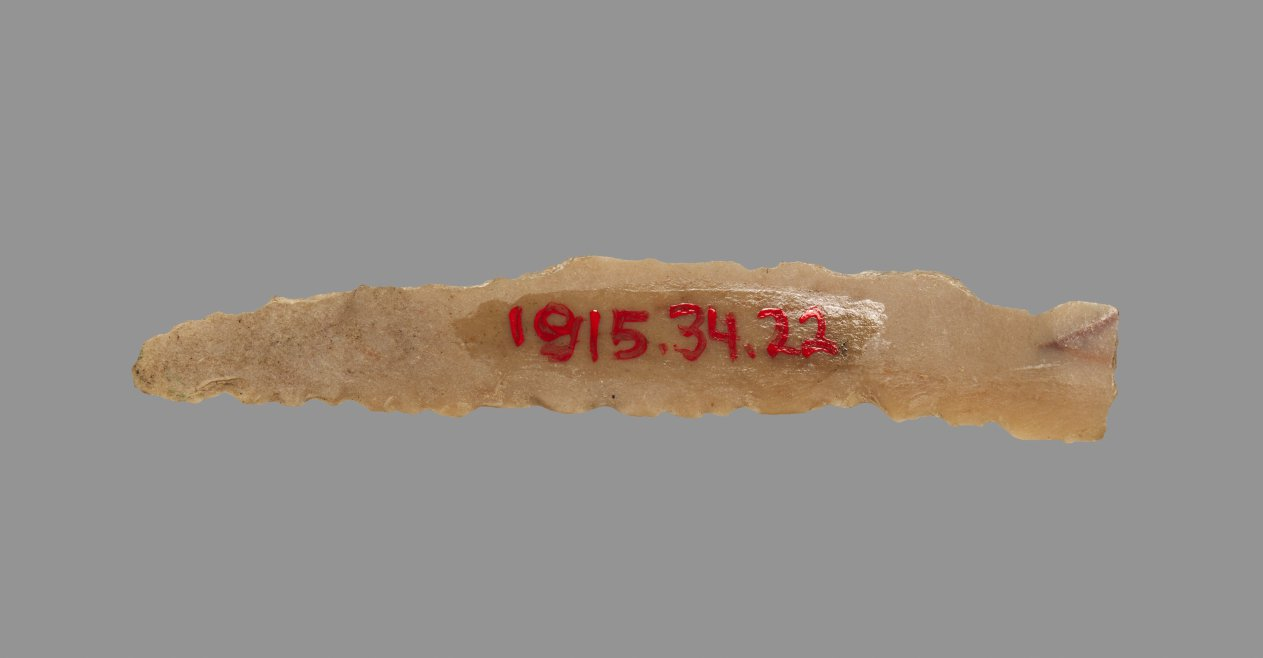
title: Sickle Blade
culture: Egypt, Middle Kingdom (2040–1648 BCE), Dynasty 12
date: 1980–1801 BCE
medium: flint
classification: Implements